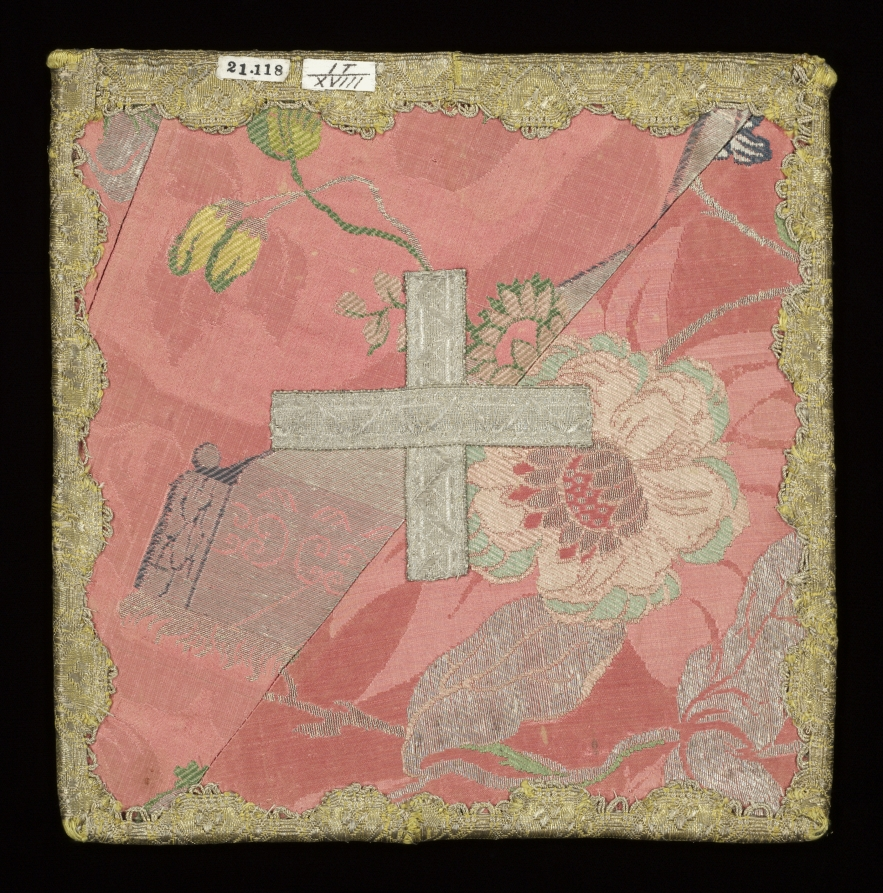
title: Burse (Corporal Case)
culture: Italy, Venice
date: second half of 18th century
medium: silk satin damask, brocaded; silk, silver and gold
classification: Textile